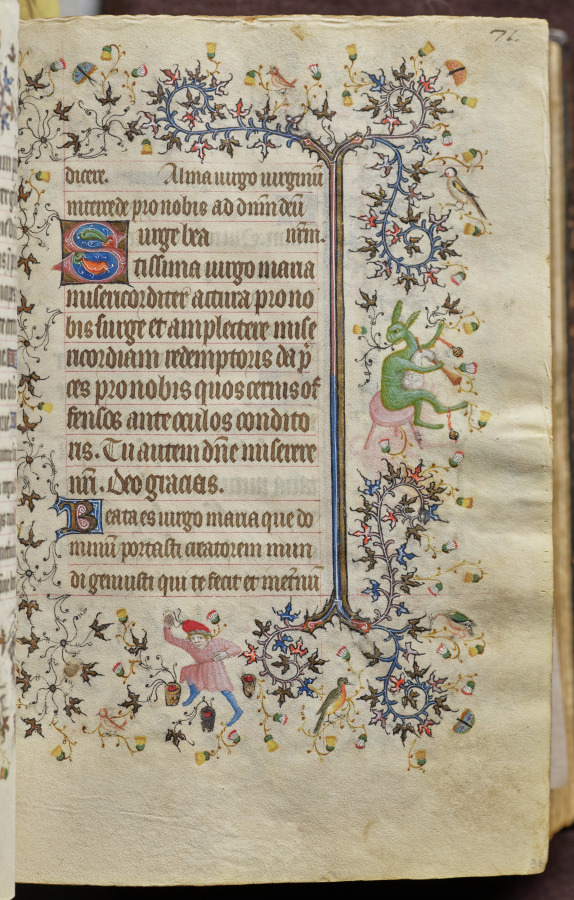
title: Hours of Charles the Noble, King of Navarre (1361-1425): fol. 36r, Text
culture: France, Paris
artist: Master of the Brussels Initials and Associates (French)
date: c. 1405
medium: ink, tempera, and gold on vellum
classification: Bound Volume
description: This precious volume was obviously highly prized by its owner, the French-born King of Navarre, who had his coat of arms painted on no less than twenty folios. Rather than directly commissioning this manuscript from a specific workshop, it seems that Charles the Noble acquired his book of hours -- perhaps ready-made for the luxury market -- while on a trip to Paris in 1404-05. A collaborative effort, six painting styles are evidenced within the pages of this codex, those of two Italians, two Frenchmen, and two Netherlanders. The painter who was responsible for the planning and decoration of the book, and who produced seventeen of the large miniatures, was a Bolognese artist known as the Master of the Brussels Initials. His principal assistant, responsible for most of the borders, was a Florentine who signed his name "Zecho" da Firenze on folio 208 verso.